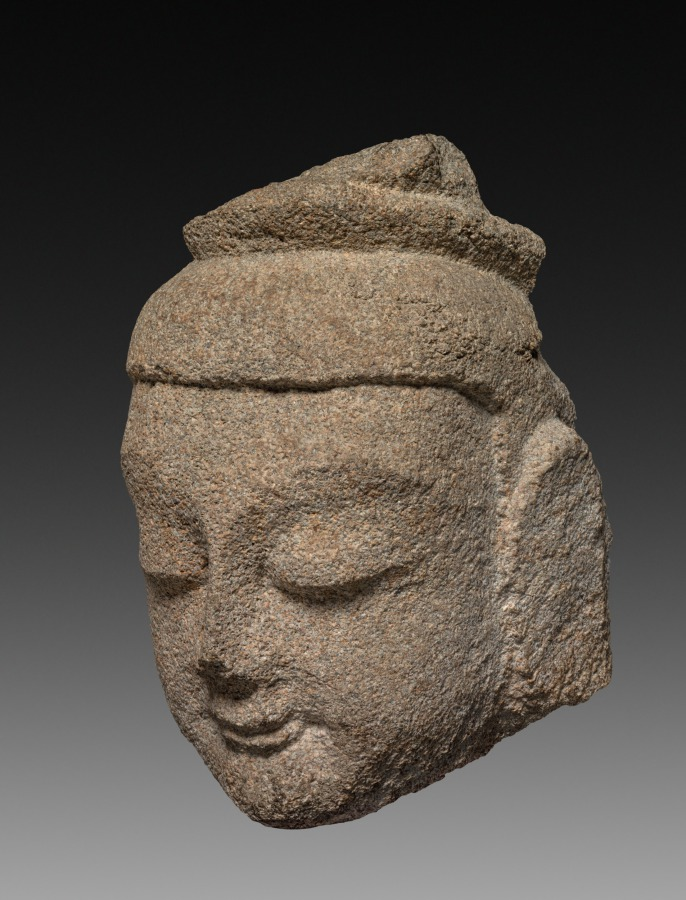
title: Fragment of Bodhisattva Head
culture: China, possibly Yungang ?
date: possibly 400s–600s CE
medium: sandstone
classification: Sculpture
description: This fragment of a bodhisattva head, was probably part of a configuration of religious figures carved out of the walls of a cave temple.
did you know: A bodhisattva is an enlightened being dedicated to the spiritual awakening of all beings.